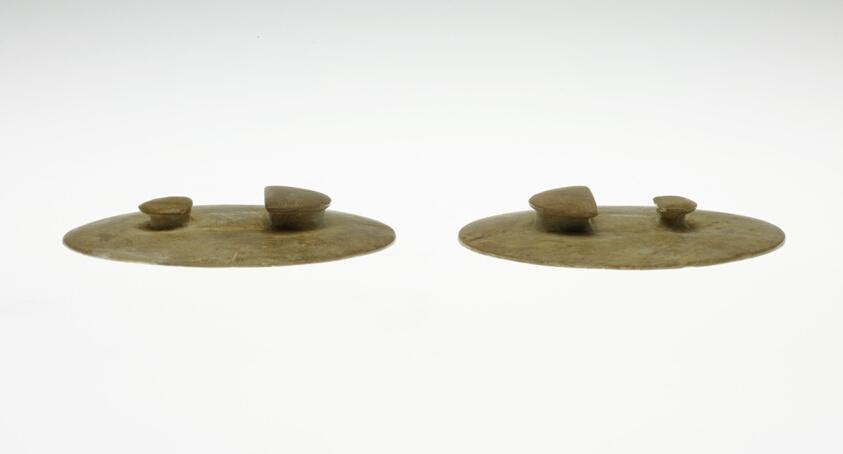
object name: Costume and Accessories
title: Pair of Earspools with Eight-Pointed Star Motif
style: mississippian, native american, archaic america, midwestern, Arts of the Americas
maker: Mississippian (Possibly Oklahoma, LeFlore County, Spiro, United States)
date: 1200–1400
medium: Stone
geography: Oklahoma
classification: ear ornament; art of the americas; costume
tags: star, directions, costume